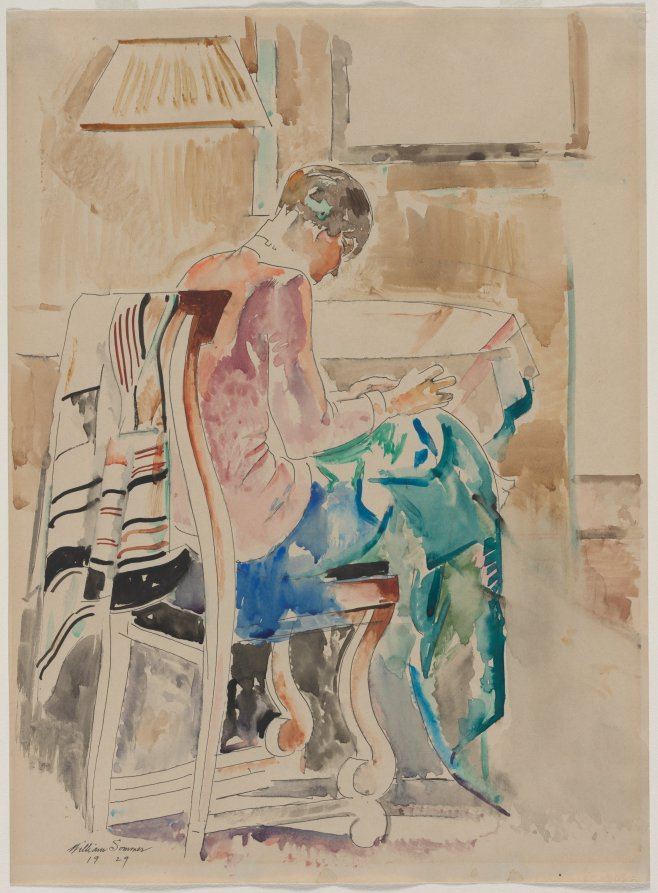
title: Girl Sewing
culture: America, Ohio, Cleveland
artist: William Sommer (American, 1867–1949)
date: 1929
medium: watercolor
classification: Drawing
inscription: Signed "William Sommer, 1929"